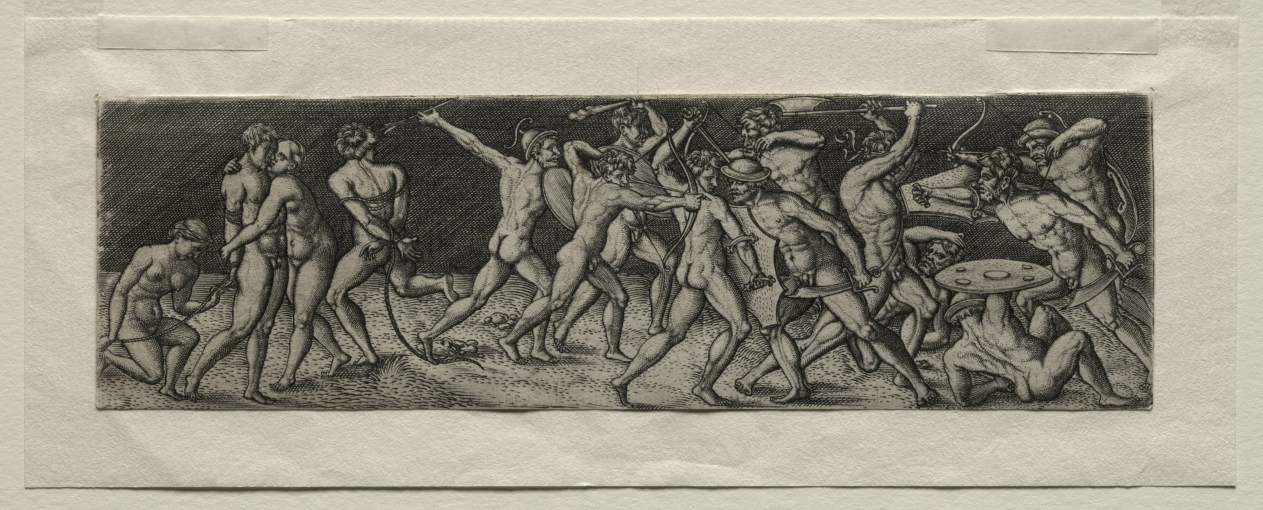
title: Fight between Eleven Warriors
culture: Netherlands, 16th century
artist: Allaert Claesz. (Netherlandish, active c. 1520–26)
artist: after Antonio del Pollaiuolo (Italian, 1431/32–1498)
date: 1520–30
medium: engraving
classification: Print